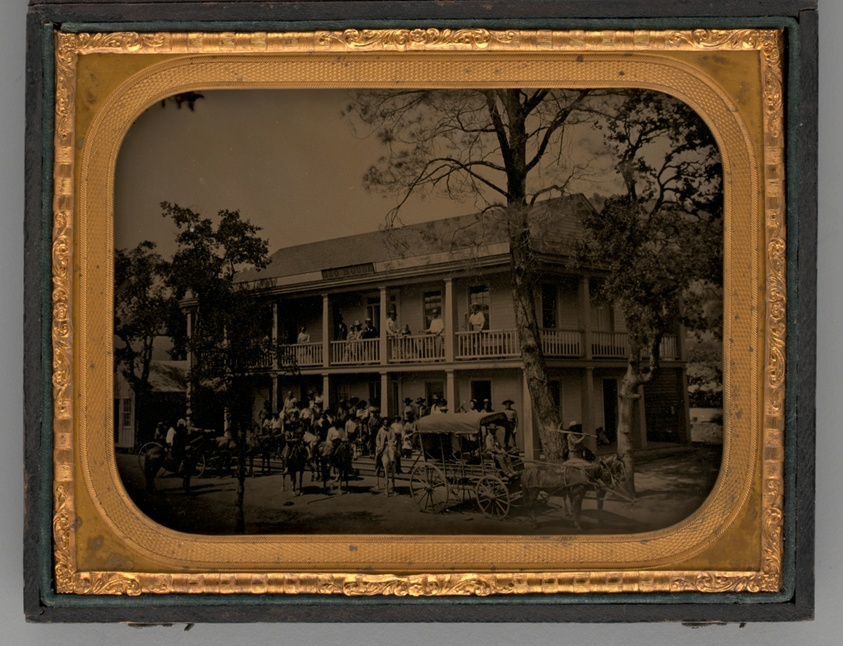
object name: Photograph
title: Untitled (John C. Fremont's Oso Hotel, Near Mariposa, CA)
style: 19th century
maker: Unknown maker; American, 19th century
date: 1856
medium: Ambrotype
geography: United States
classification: portrait; photography; photographic process; photograph; ambrotype; portrait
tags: lundberg collection, houses, buildings, people